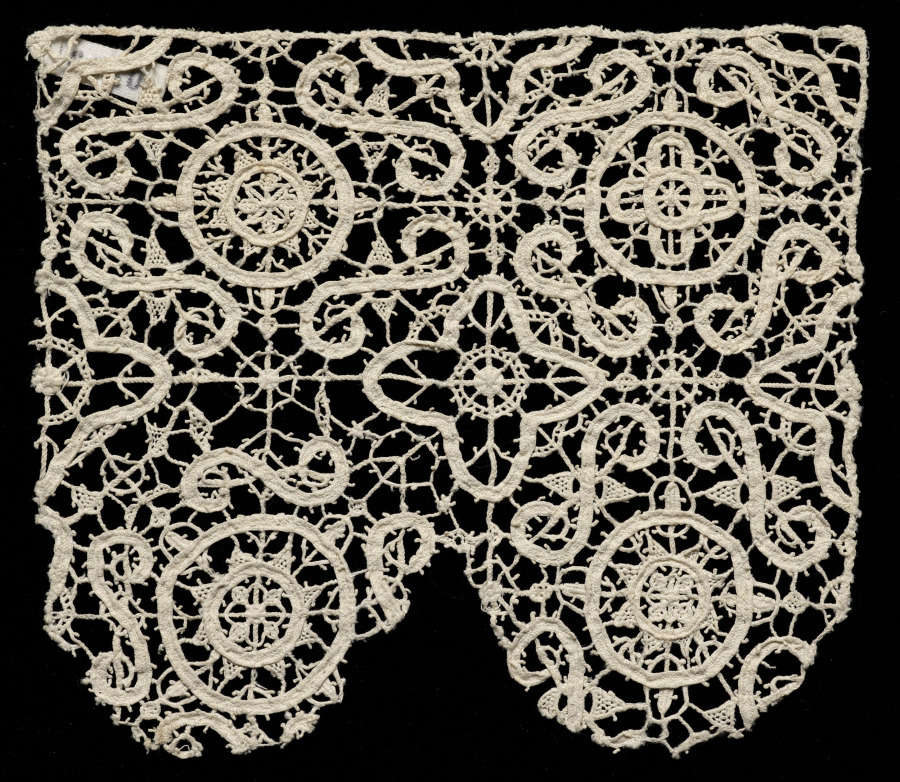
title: Lace Fragment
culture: Italy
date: 1600s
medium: Needle and bobbin lace (mezzo punto)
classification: Lace